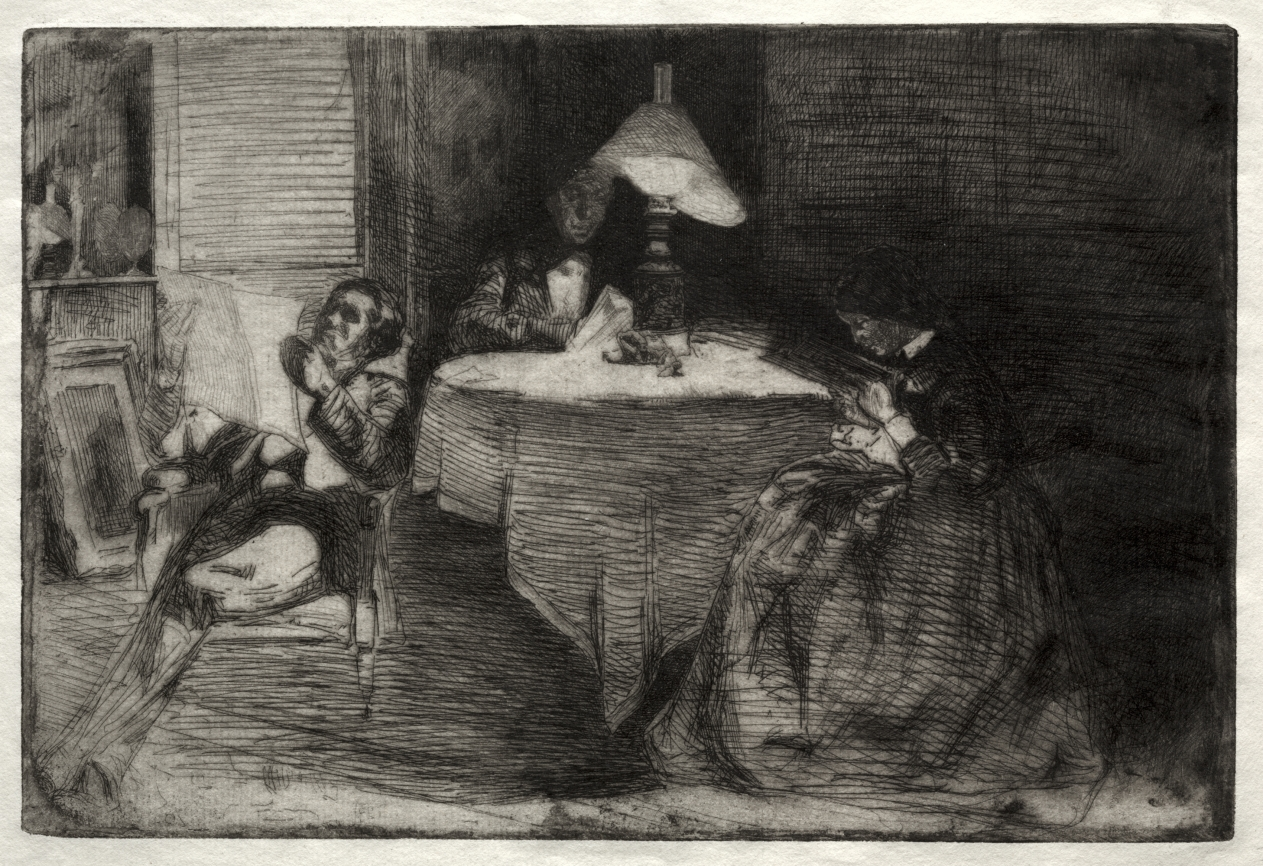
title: The Music Room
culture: America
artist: James McNeill Whistler (American, 1834–1903)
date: 1859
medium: etching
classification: Print